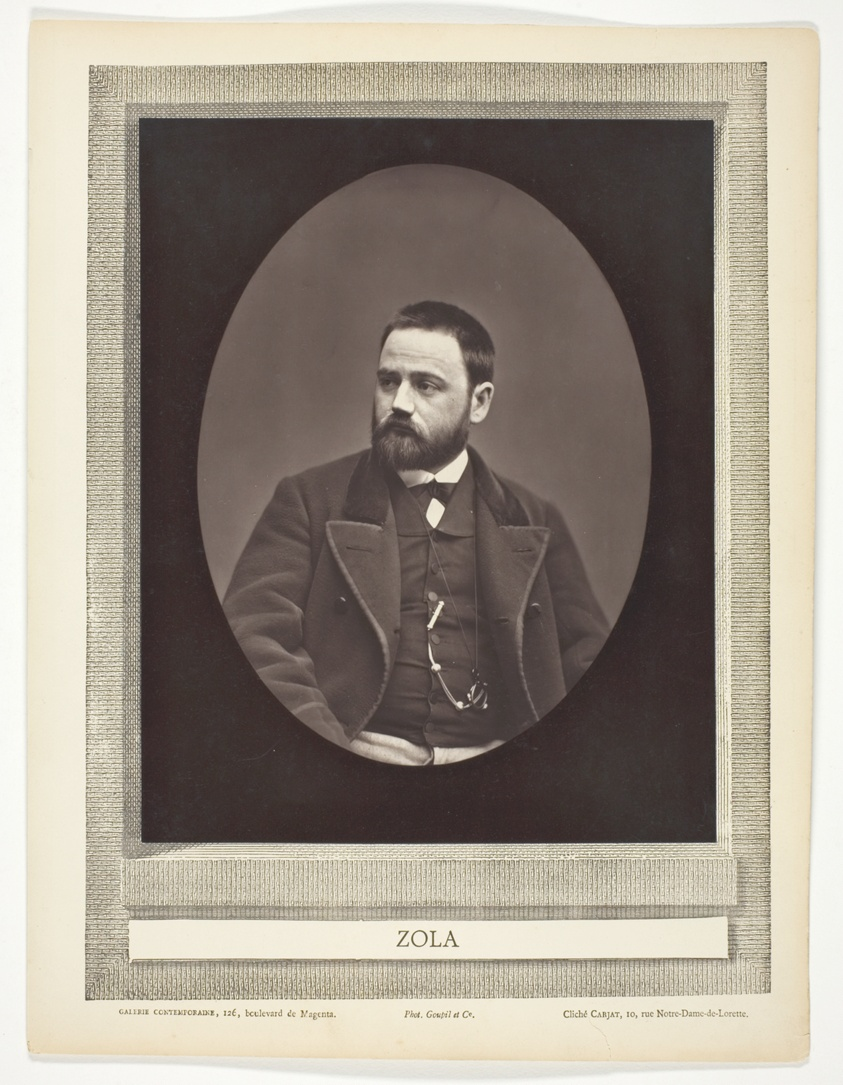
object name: Photograph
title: Émile Zola (French novelist, playwright, and journalist, 1840-1902)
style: 19th century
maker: Étienne Carjat; French, 1828–1906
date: c. 1876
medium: Woodburytype, from the periodical “Galerie Contemporaine Littéraire, Artistique” (1876), volume 3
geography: France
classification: woodburytype; photomechanical process; photography; photograph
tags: Collected by Hugh Edwards, Contemporaine Littéraire